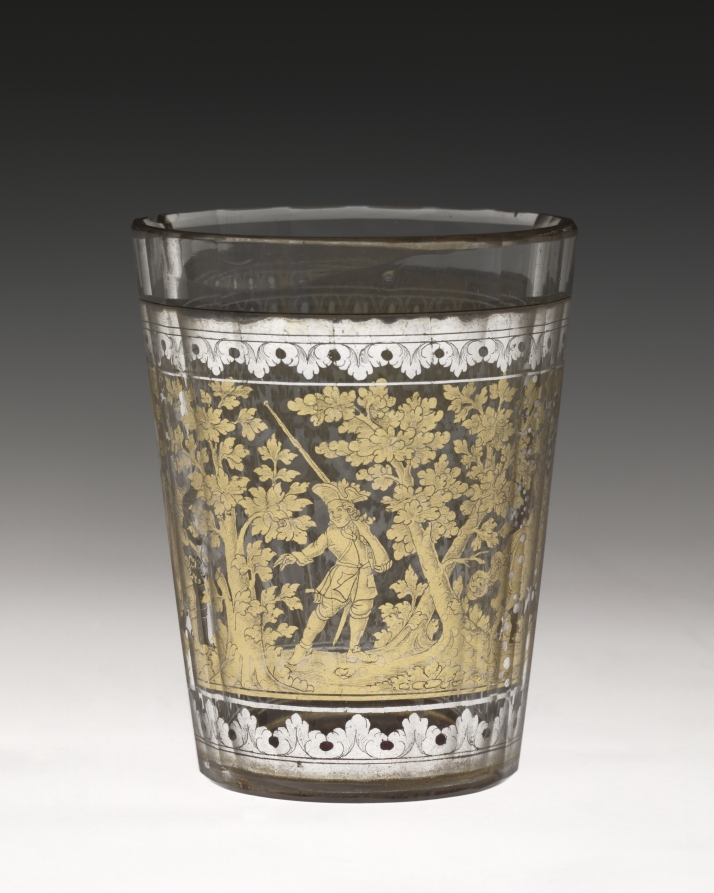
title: Tumbler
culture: Bohemia, 18th century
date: c. 1730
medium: zwischengoldglas (glass)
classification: Glass